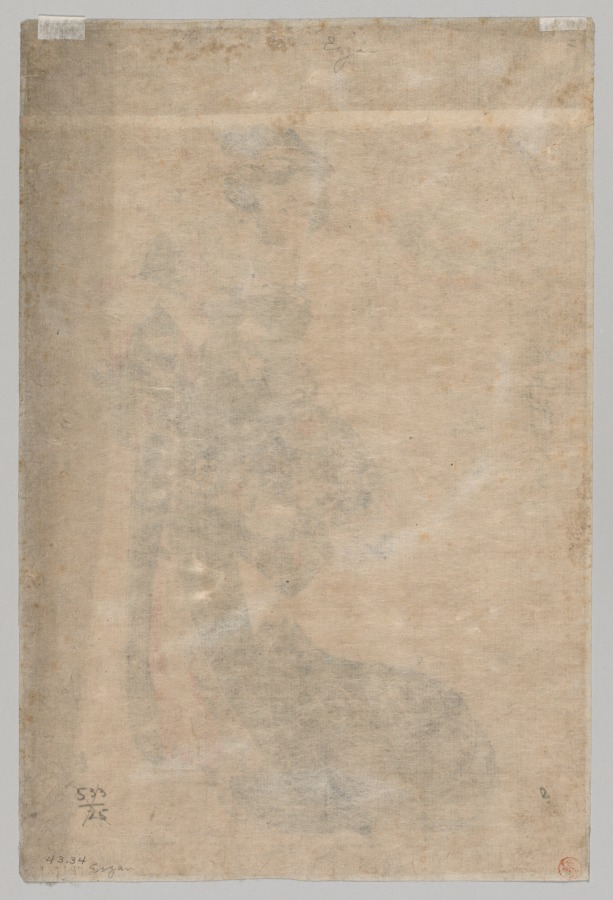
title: Courtesan with Sake Cup and Scroll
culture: Japan, Edo period (1615–1868)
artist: Kikukawa Eizan (Japanese, 1787–1867)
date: 1787–1867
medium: color woodblock print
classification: Print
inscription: Signature: Kikugawa Yeizan fude